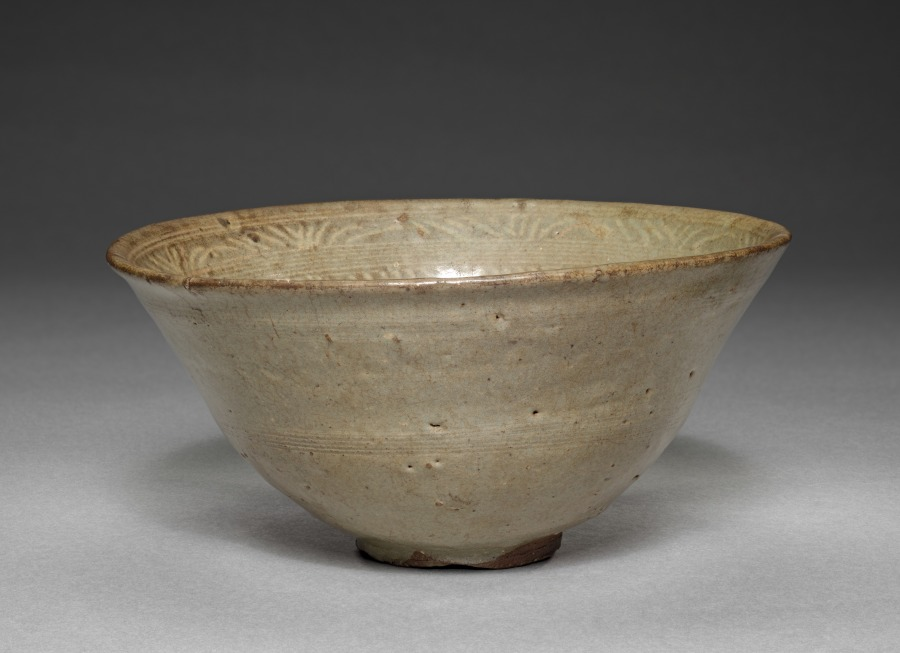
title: Bowl with Stamped Floral Decoration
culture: Korea, Joseon dynasty (1392–1910)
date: 1400s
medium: glazed ceramic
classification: Ceramic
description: This type of wide-mouthed bowl was used every day in Korea, not exclusively for tea drinking. But when it was introduced to Japan around the early 16th century, its imperfect appearance evoking the aesthetics of wabi-sabi caused it to be repurposed as a tea bowl. Korean tea bowls were circulated as an item of foreign luxury among Japanese military elites. Many Korean potters were abducted to japan during the Japanese invasions (1592–98) and some settled down in Japan, particularly in the Saga prefecture in Kyushu. A Japanese tea bowl such as 1983.158 in the CMA collection is one example possibly created by the descendants of dislocated Korean potters.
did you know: This type of humble tea bowl was highly praised among Japanese collectors for its imperfect beauty.